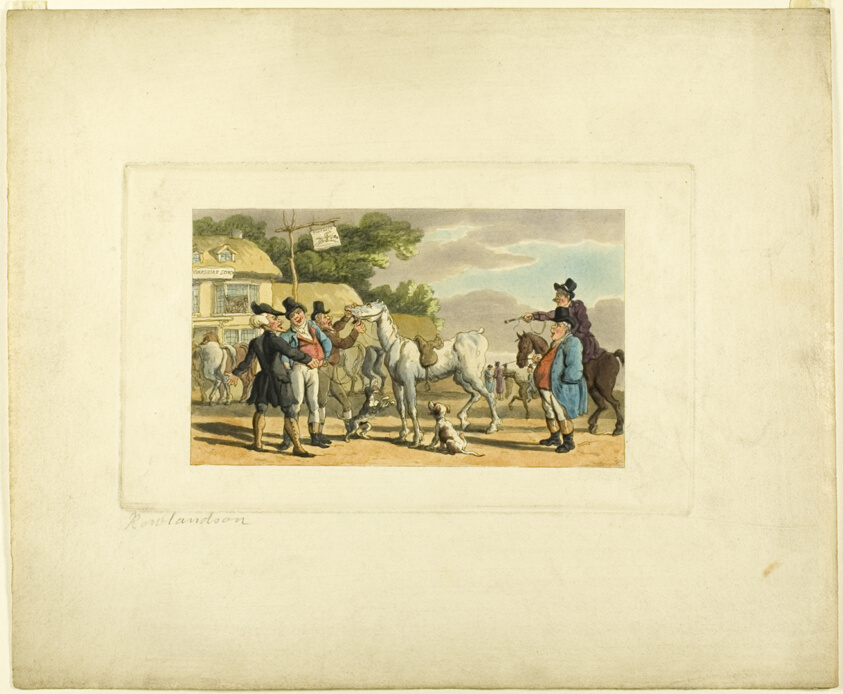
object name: Print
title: Doctor Syntax Sells Grizzle, from The Tour of Doctor Syntax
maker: Thomas Rowlandson (English, 1756-1827); published by Rudolph Ackermann (English, 1764-1834)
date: c. 1812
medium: Hand-colored etching and acquaint on ivory wove paper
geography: England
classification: etching; print; prints and drawing